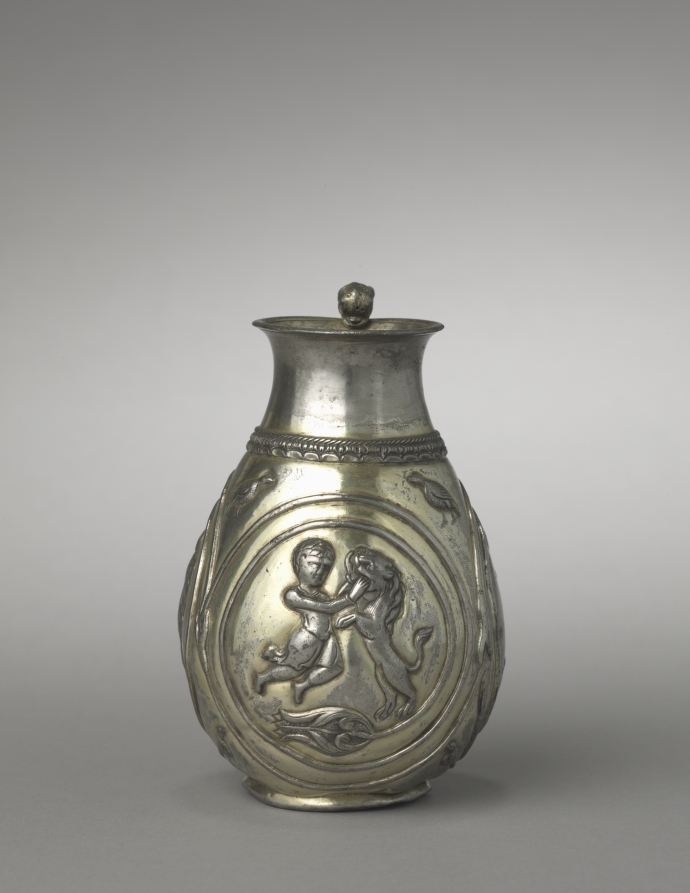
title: Hunt Pitcher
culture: Iran, Sasanian Empire (224–651 CE)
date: 500–600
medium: silver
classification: Metalwork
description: Every good Zoroastrian was supposed to spend one-third of his day farming; one-third philosophizing; and one-third eating, resting, and at pleasure. The abundance of Sasanian luxury goods is evidence of the importance accorded the last third of the day.